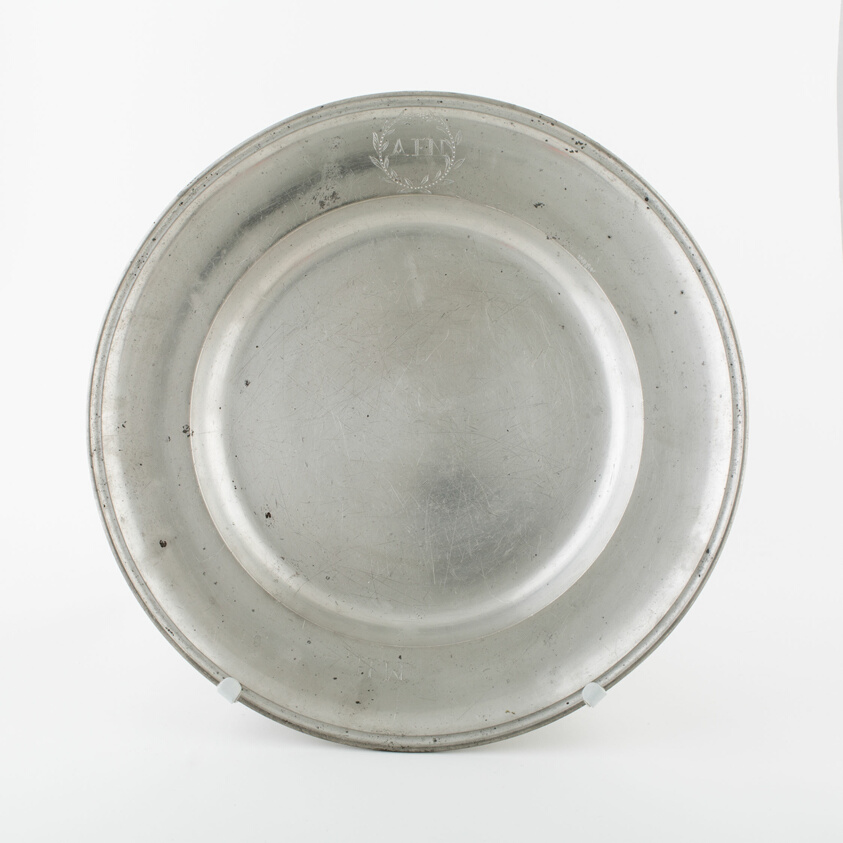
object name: Metalwork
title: Charger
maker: Sebald Ruprecht; German, active 1700-1750; Germany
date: 1700/50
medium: Pewter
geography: Germany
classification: pewter; metalwork; european decorative arts